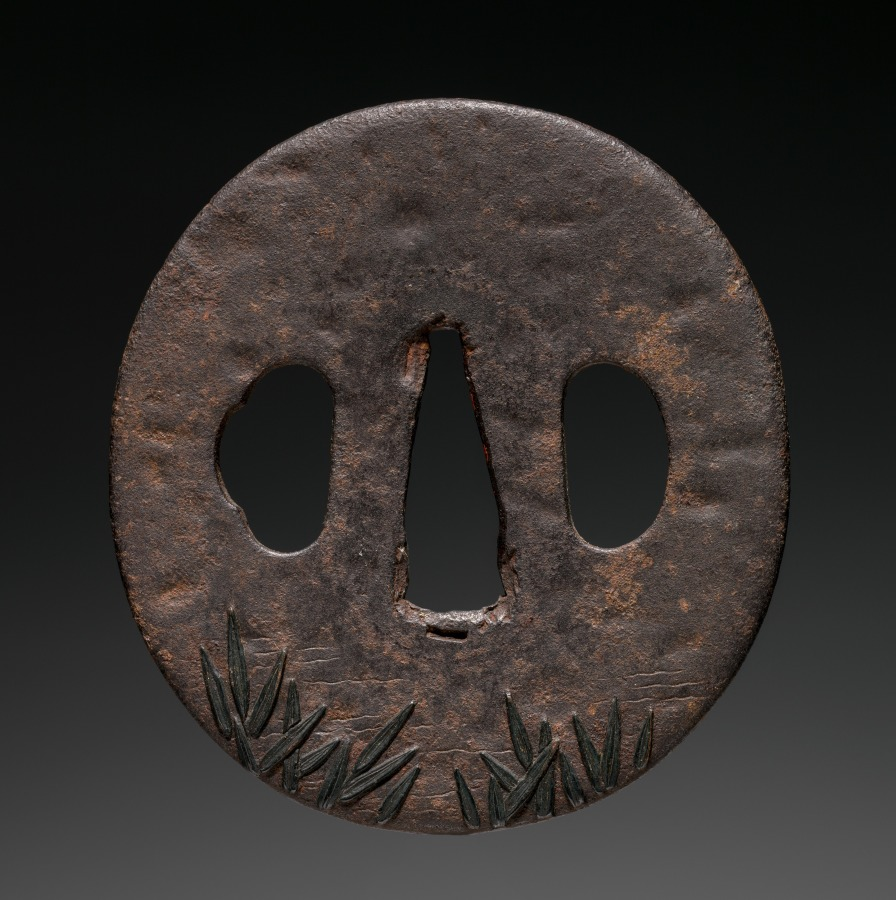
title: Sword Guard (Tsuba) with Reeds and Geese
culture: Japan, possibly Edo period (1615-1868)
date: c. 1615–1868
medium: iron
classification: Arms and Armor